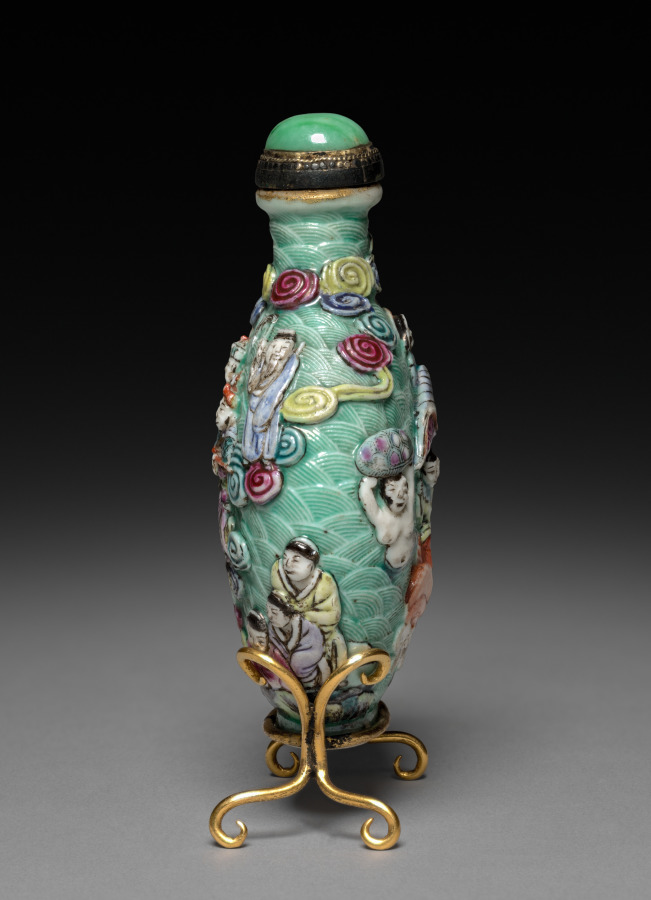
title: Flattened Ovoid Snuff Bottle with Stopper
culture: China, Qing dynasty (1644-1911), Jiaqing reign (1796-1820)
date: 1796–1820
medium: porcelain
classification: Ceramic